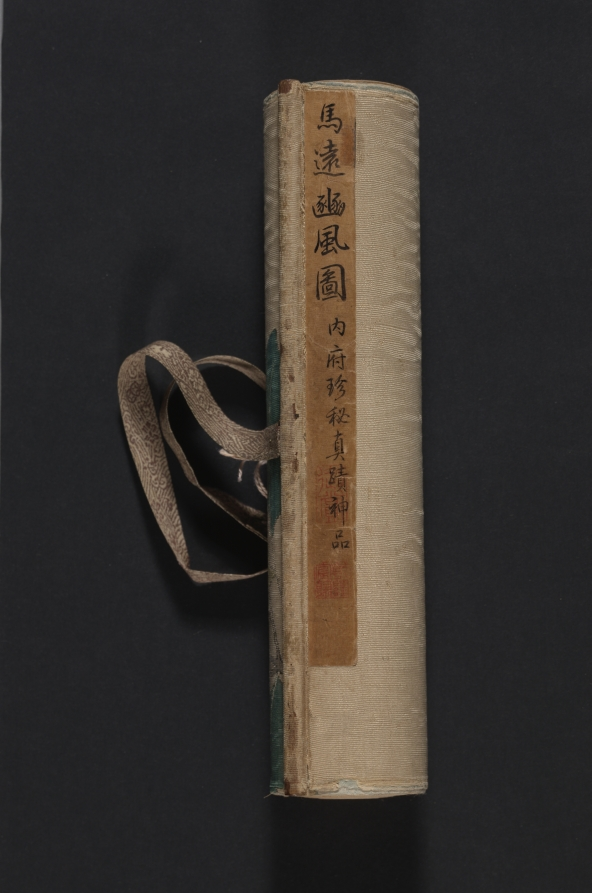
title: "Seventh Month" from the Odes of Bin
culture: China, Southern Song dynasty (1127-1279)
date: 1200s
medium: Handscroll; ink and color on silk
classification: Painting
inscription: Colophons: 1. [on the frontispiece] by the Qianlong emperor (dated 1741). 2. by Lu Wan (dated Zhengde dingchou, 1517). 2. by the Jiaqing emperor (dated 1807).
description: According to Confucian thought, the ruler looks after the well-being of his people which involves agricultural activities. Seventh Month from the ancient Odes of Bin in the Shijing (Book of Poetry) describes occupations throughout the year, including plowing, harvesting, hunting, making clothes, and observing rituals. The earliest illustrations of these Odes accompanied by text were commissioned by Southern Song emperor Gaozong (reigned 1127–1162). As the lower Yangzi delta had become the new seat of government, Gaozong had sets of these illustrations produced by court artists to revive the dynasty and convince the Confucian officialelite of his legitimacy to rule.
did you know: The Odes of Bin appears in the classic Shijing (Book of Poetry), an anthology of more than 300 poems, folk songs, and ceremonial hymns that were originally chanted to music.